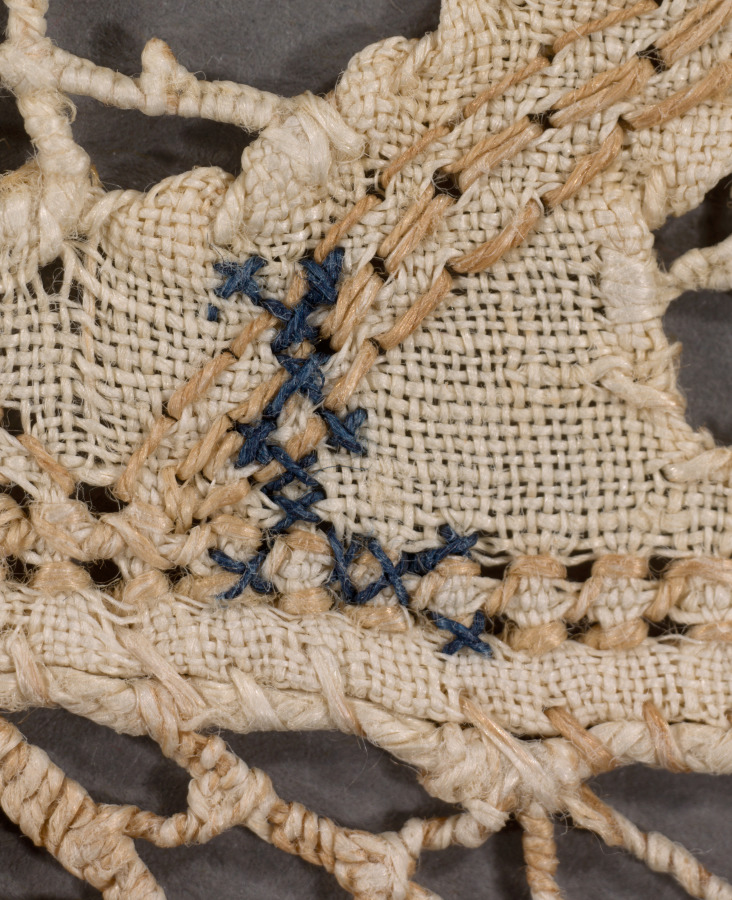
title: Lace Cloth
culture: Italy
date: 1560–1600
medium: Linen; needle lace (cutwork and reticella)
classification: Lace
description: Consisting of more than 80 squares of cutwork (a cut and embellished linen ground) and rectangles of reticella (needle lace), this luxurious cover could have been made by a single person or several people who divided the work. Close looking reveals that the cloth is made with threads of two very slightly different colors: bleached and unbleached linen. Together the sections resemble snowflakes, which are of similar shape and size but vary subtly from one another. The perplexing dark stitches in the upper left corner do not repair damage, and might be the maker’s signature.